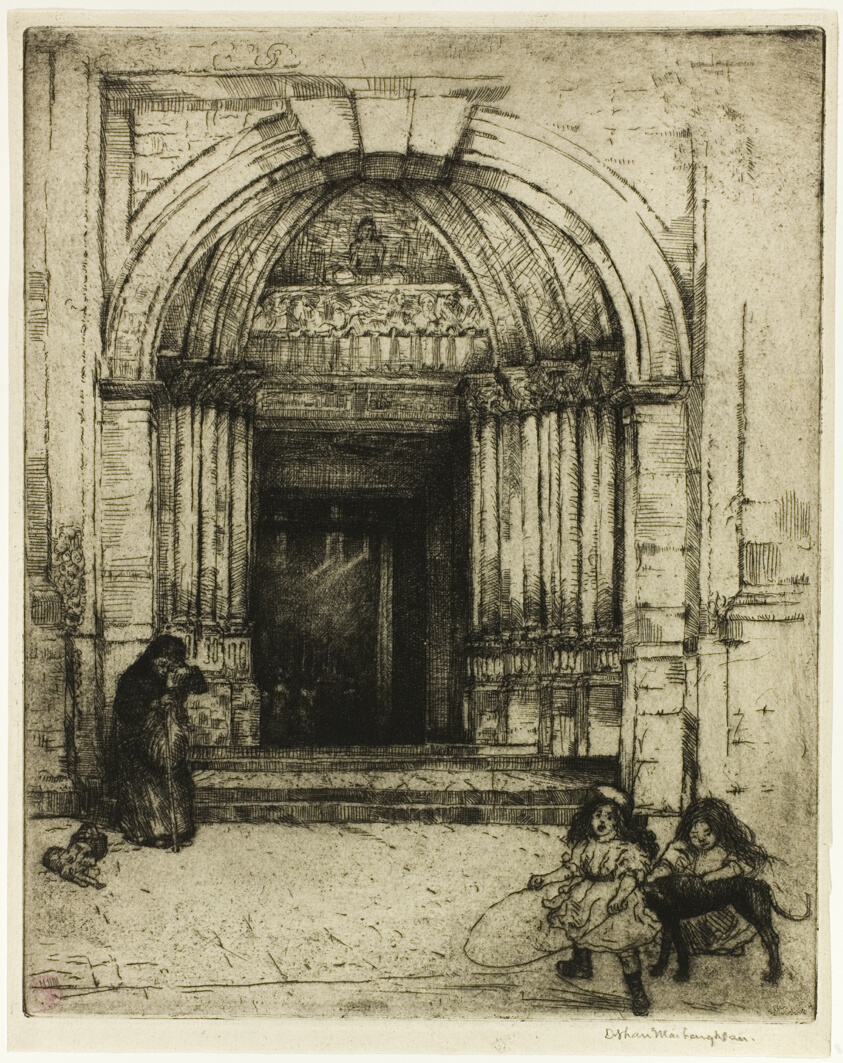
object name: Print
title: Portal of St. Germain-des-Prés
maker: Donald Shaw MacLaughlan (American, born Canada, 1876-1938)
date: 1900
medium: Etching in black on cream laid paper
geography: United States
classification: etching; print; prints and drawing